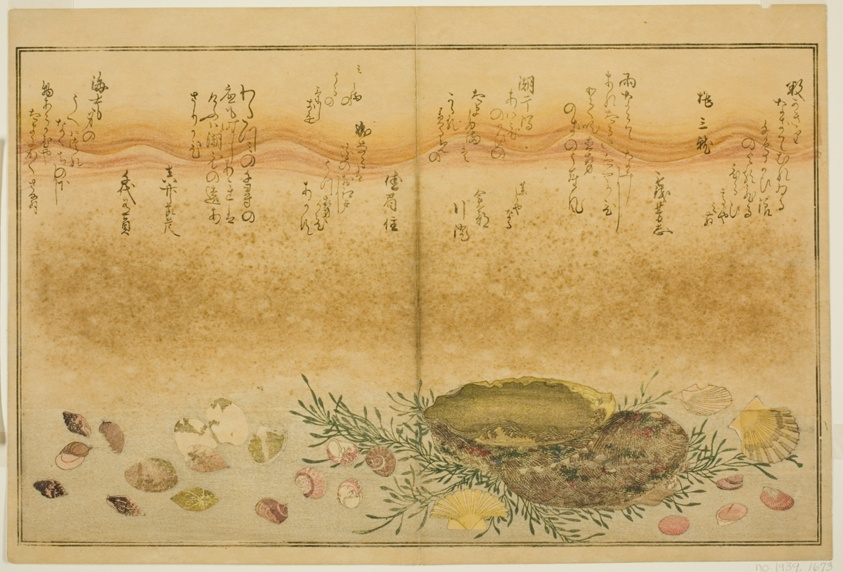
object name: Print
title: Chidori-gai, itaya-gai, awabi, utsuse-gai, asari-gai, and monoara-gai, from the illustrated book "Gifts from the Ebb Tide (Shiohi no tsuto)"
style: Japanese (culture or style)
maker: Kitagawa Utamaro 喜多川 歌麿; Japanese, 1753 (?)-1806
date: 1789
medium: Color woodblock print; double-page illustration from book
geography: Japan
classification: woodblock print; print; asian art